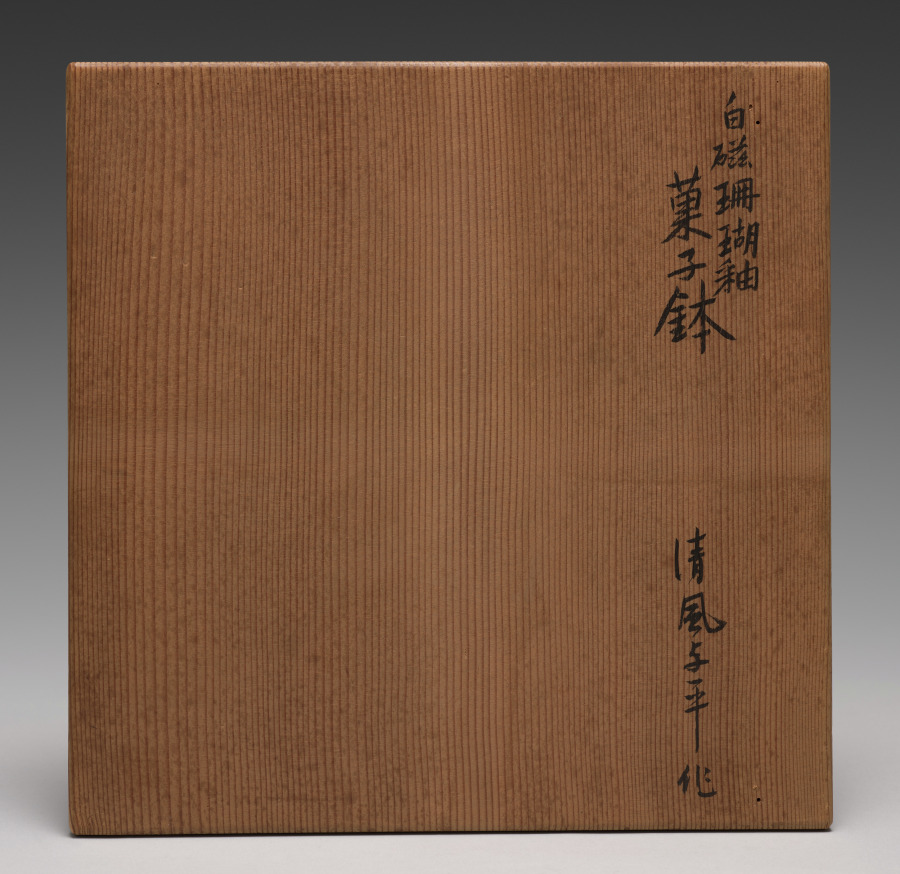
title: Sweets Bowl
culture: Japan, Taishō period (1912–26) or Shōwa period (1926–89)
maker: Seifū Yohei IV (Japanese, 1872–1951)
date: 1914–46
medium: Porcelain with coral red glaze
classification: Ceramic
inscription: 清風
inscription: 成山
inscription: 清風造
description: Like his father, Yohei IV also produced works with red monochrome glazes, like this red coral–glazed sweets bowl with white interior.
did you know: Seifū Yohei IV was active at home and abroad and won international recognition for his ceramic's glazes and designs.